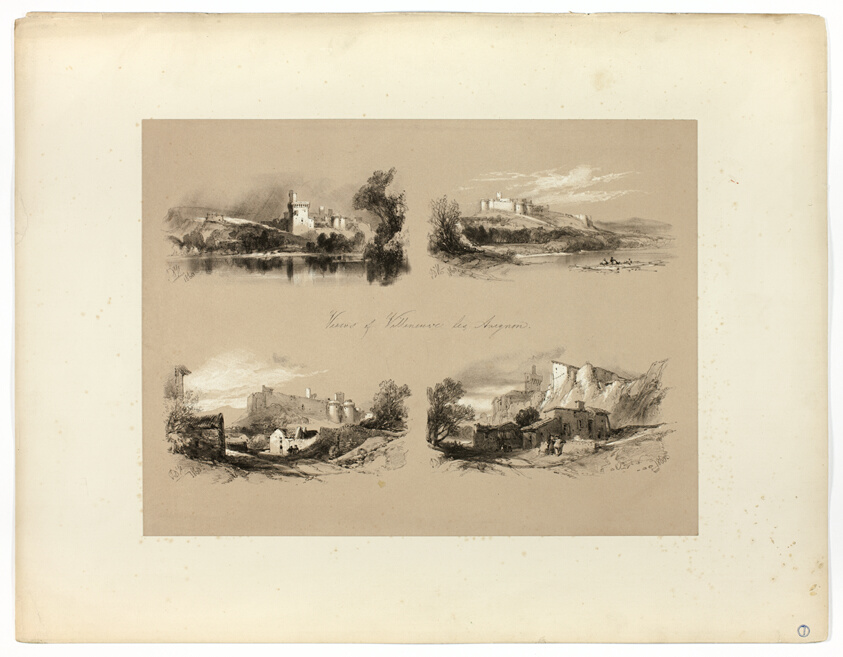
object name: Print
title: Views of Villenueve les Avignon, from Picturesque Selections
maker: James Duffield Harding, (English, 1798-1863); Published by W. Kent and Co.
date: c. 1860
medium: Lithograph on paper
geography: England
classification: lithograph; print; prints and drawing